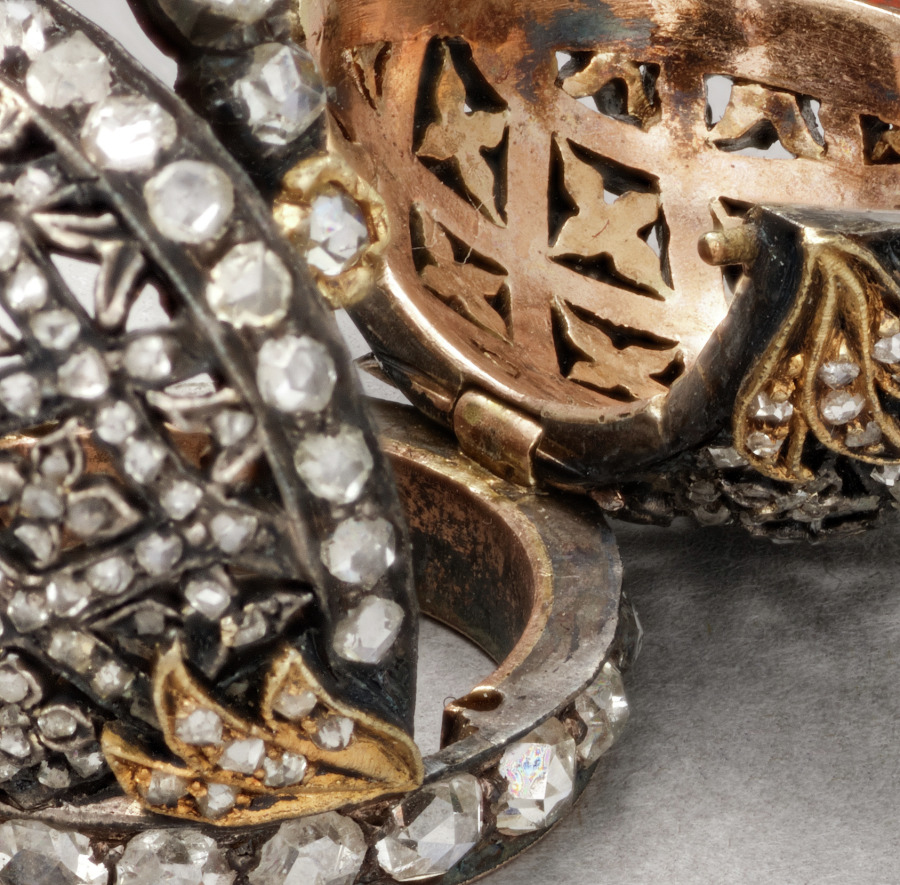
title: Miniature Crown Surprise from the Lapis Lazuli Easter Egg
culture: Russia, St. Petersburg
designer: attributed to Peter Carl Fabergé (Russian, 1846–1920)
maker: attributed to House of Fabergé (Russian, 1842–1918)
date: c. 1885–90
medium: gold, enamel, lapis lazuli, pearls, diamonds, rubies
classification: Miscellaneous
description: This Easter egg, like the subsequent ones produced by Fabergé for the imperial family, contains a surprise when opened. In this case, the egg opens to display a yellow enameled cover, resembling an egg yolk, which then opens to reveal a tiny replica of the Russian imperial crown, containing either a ruby or a pink sapphire suspended on a chain.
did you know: The tiny diamond encrusted crown surprise is a replica of the Russian imperial crown made for Empress Catherine the Great in the 1700s.